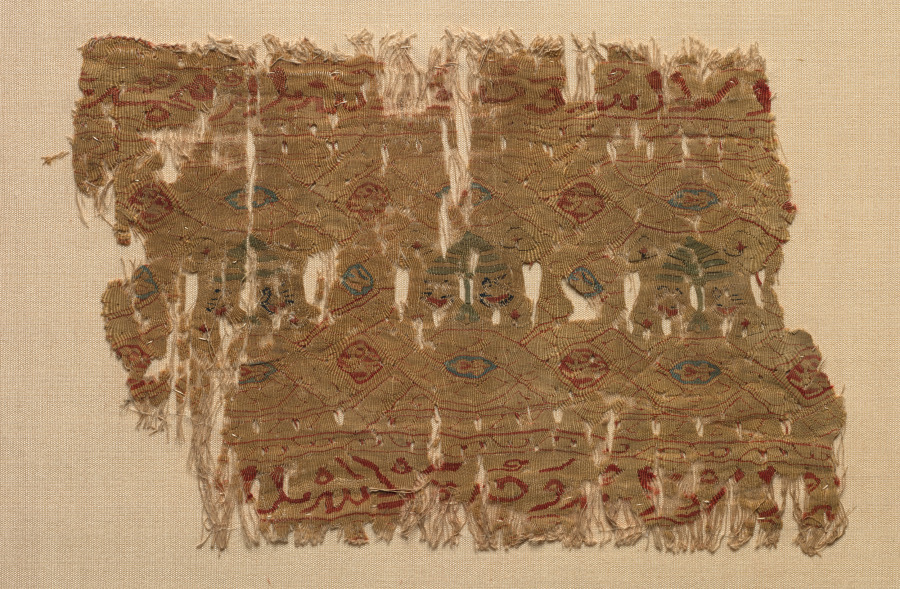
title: Fragment of a Tiraz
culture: Egypt, Fatimid period, probably during Caliphate of al-Hafiz, AH 524-544 (A.D. 1130-1149)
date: 1130 – 1149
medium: tapestry (originally inwoven in a tabby ground); linen and silk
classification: Textile